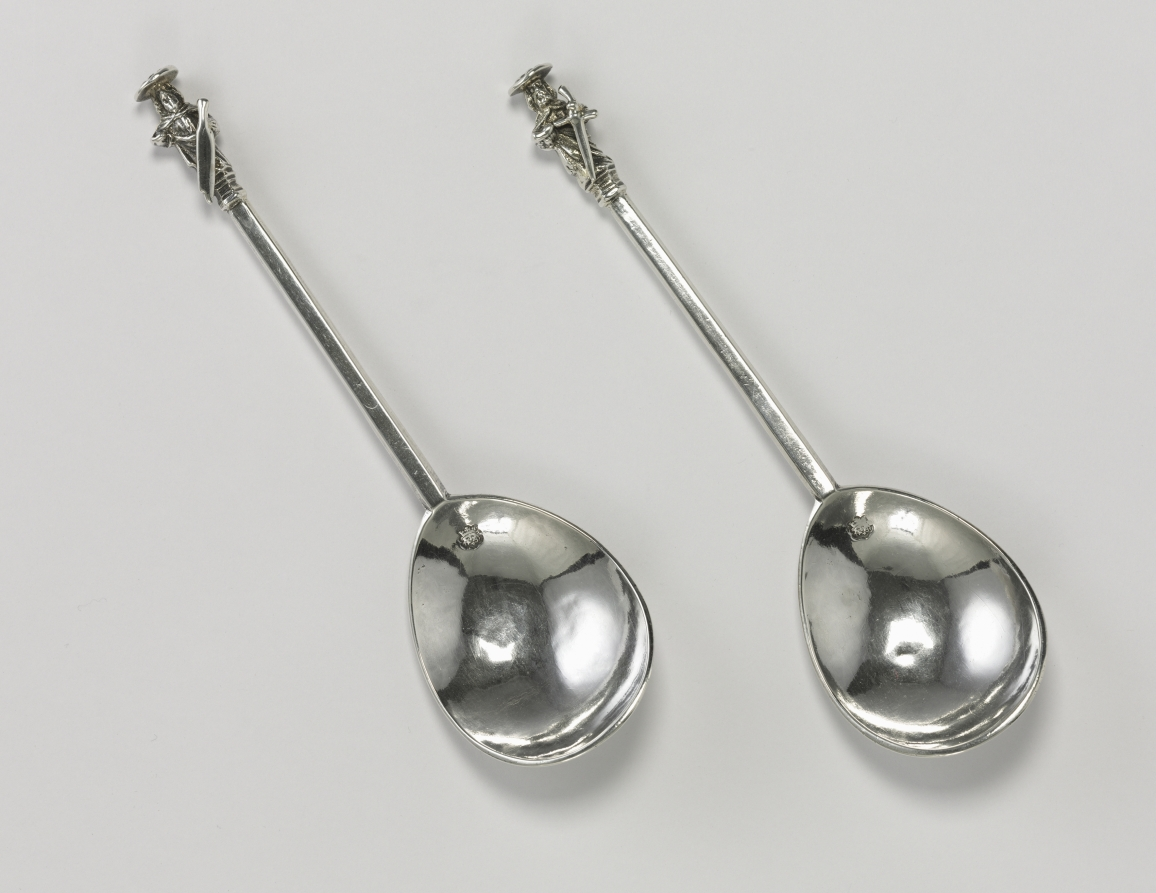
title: Saint Bartholomew Spoon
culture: England, London, 17th century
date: 1622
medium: silver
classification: Silver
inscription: pricked on back of bowl: "R H."